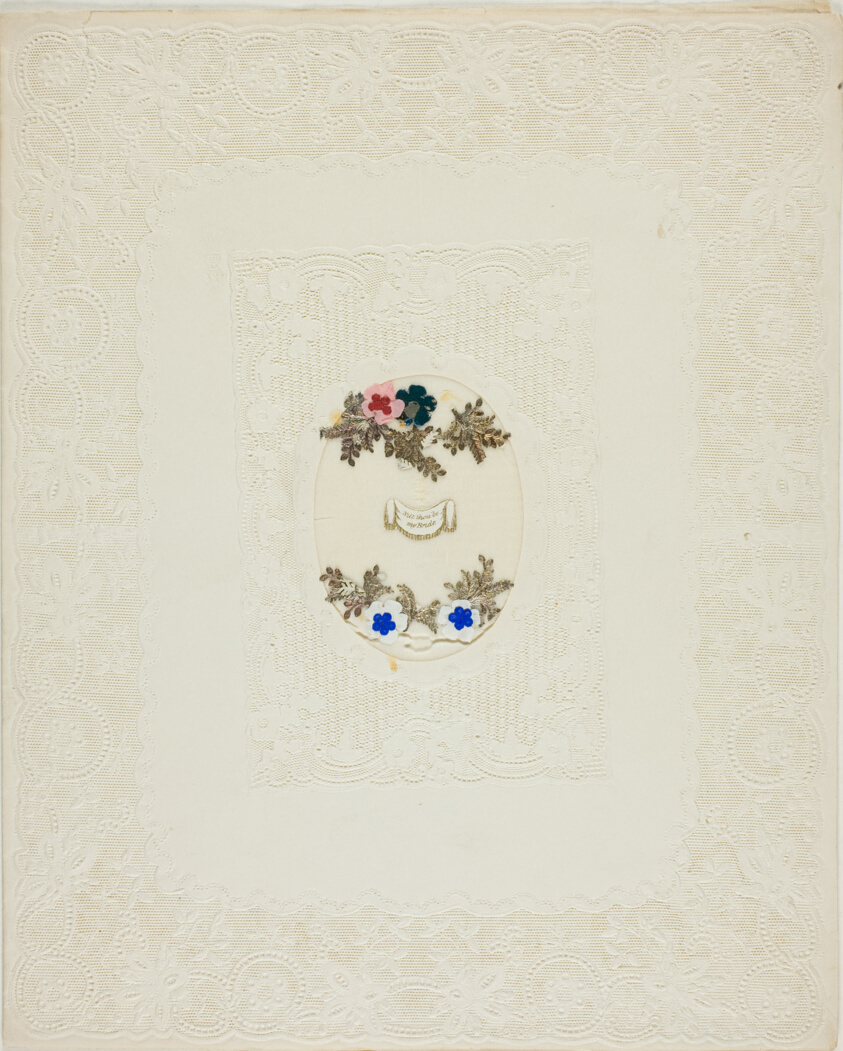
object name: Drawing and Watercolor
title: Wilt Thou Be My Bride (valentine)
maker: David Mossman (English, 1825-1901)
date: 1847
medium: Collaged elements on cut and embossed ivory wove paper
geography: England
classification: valentine; prints and drawing; paper